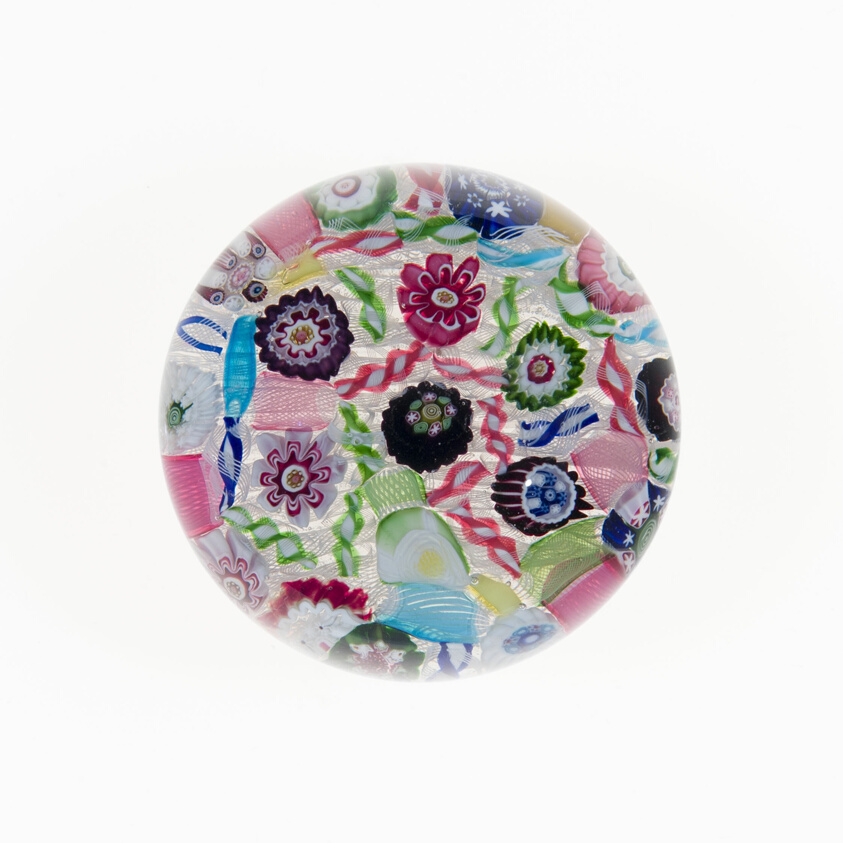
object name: Glass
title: Paperweight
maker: Clichy Glassworks (Cristalleries de Clichy); Clichy, France, 1837-1885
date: 19th century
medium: Glass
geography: Clichy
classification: paperweight; millefiori; european decorative arts; glass